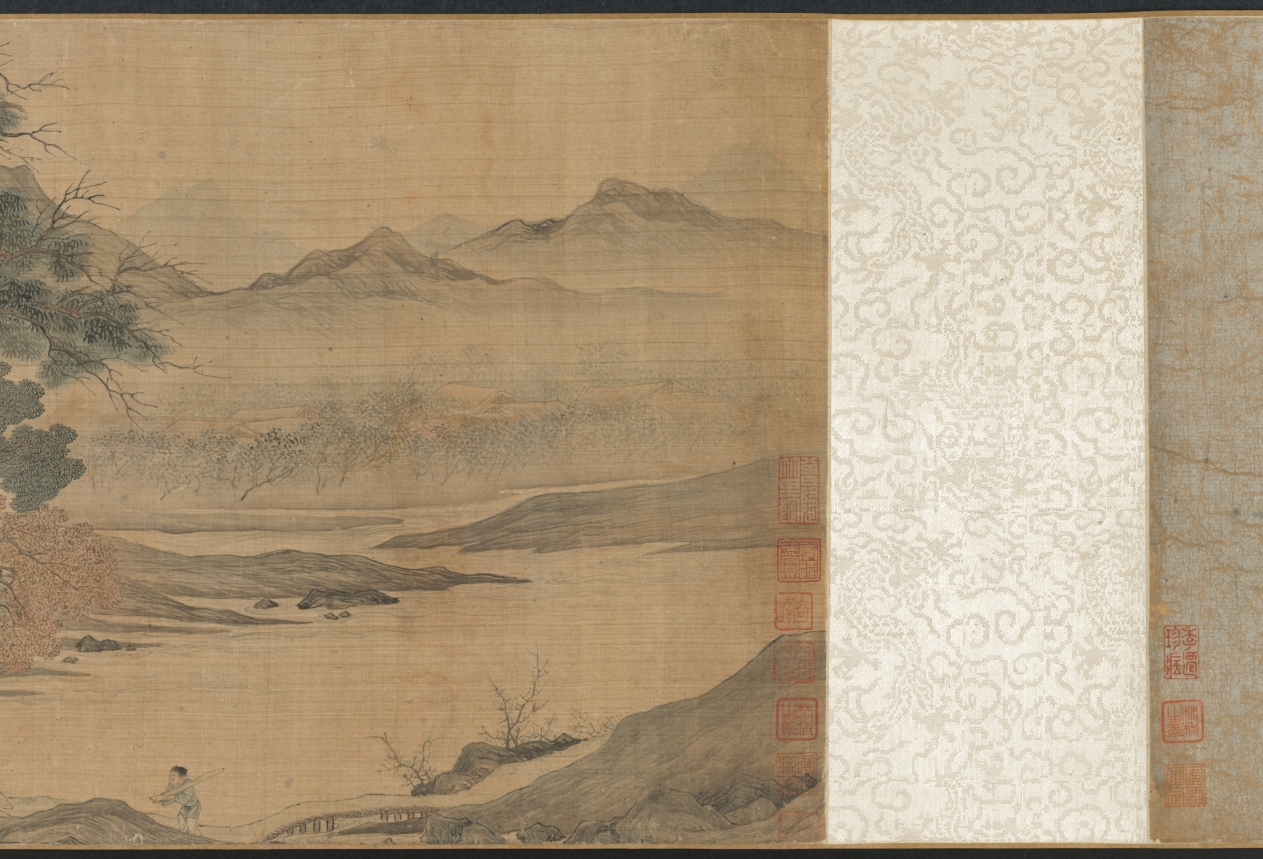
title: Scholar-Hermits in the Autumn Mountains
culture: China, Ming dynasty (1368–1644)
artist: Tang Yin (Chinese, 1470–1523)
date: 1500–1510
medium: handscroll, ink and light color on silk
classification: Painting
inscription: Artist's signature and 2 seals at end of scroll: Tang Yin [seals] T'ang Po-hu; T'ang Tzu'wei t'u-shu.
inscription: Title on frontispiece by Li Cho-kung (dates unknown).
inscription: 1 colophon and 11 additional seals: 1 colophon dated 1915 of Wu Tso-hsi (19th-20th c.); 2 seals of Gao Qifeng 高奇峰 (1889–1933); 5 seals of C. C. Wang 王季遷 (1907–2003); 4 seals unidentified.